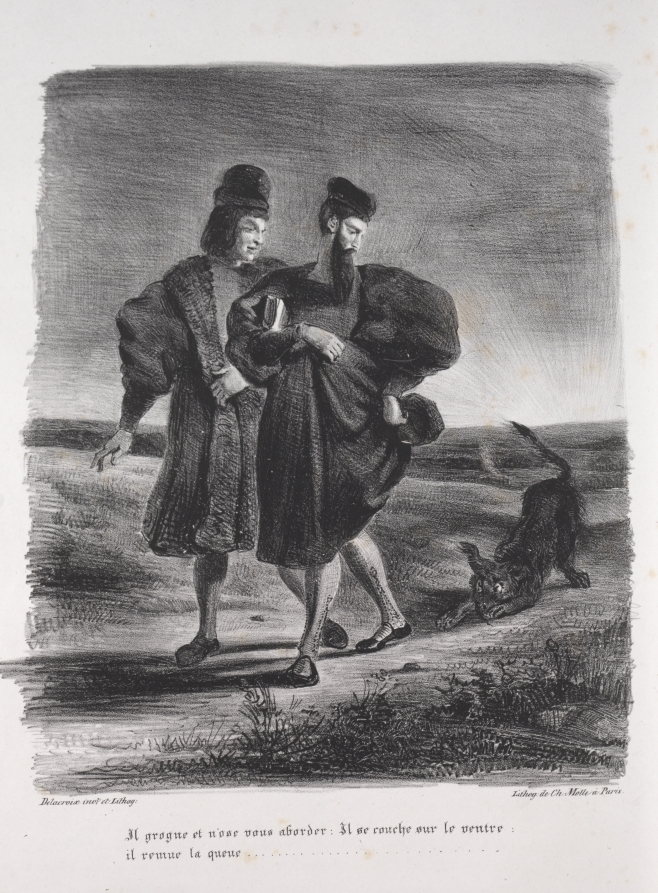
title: Illustrations for Faust: Faust, Méphistophélé and the barbet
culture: France, 19th century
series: Faust: Tragédie de M. de Goethe, translated into French by Albert Stapfer.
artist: Eugène Delacroix (French, 1798–1863)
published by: Chez Ch. Motte, Éditeur, distributed by Chez Sautelet, Libraire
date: 1828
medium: lithograph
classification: Print